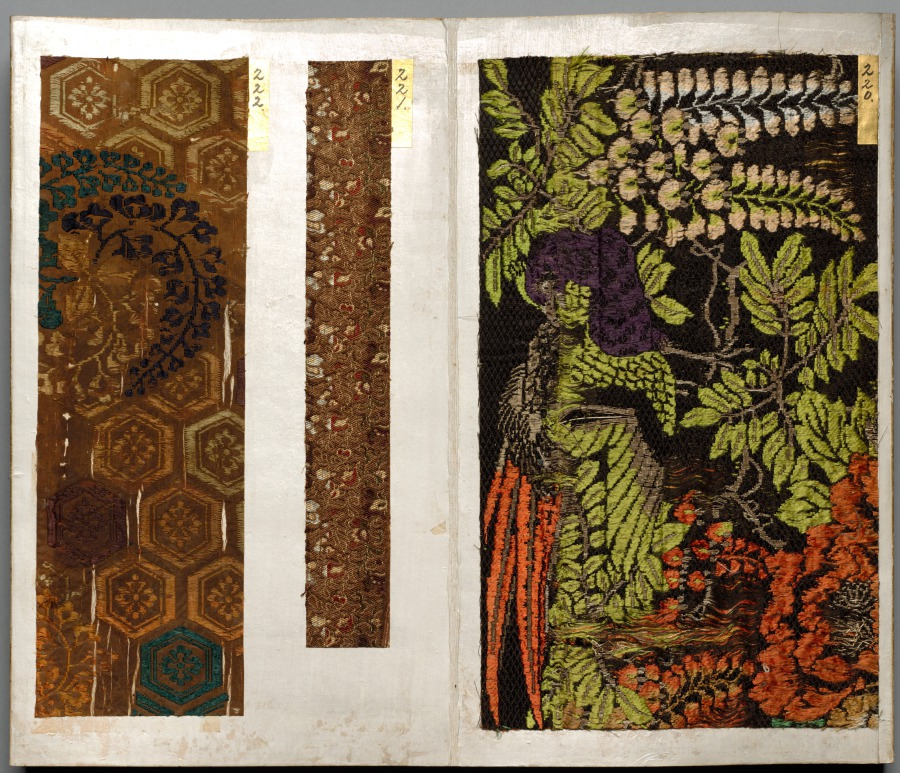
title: Album of Textile Samples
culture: Japan, Edo period (1615–1868)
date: 1600s-1700s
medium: silk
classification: Textile